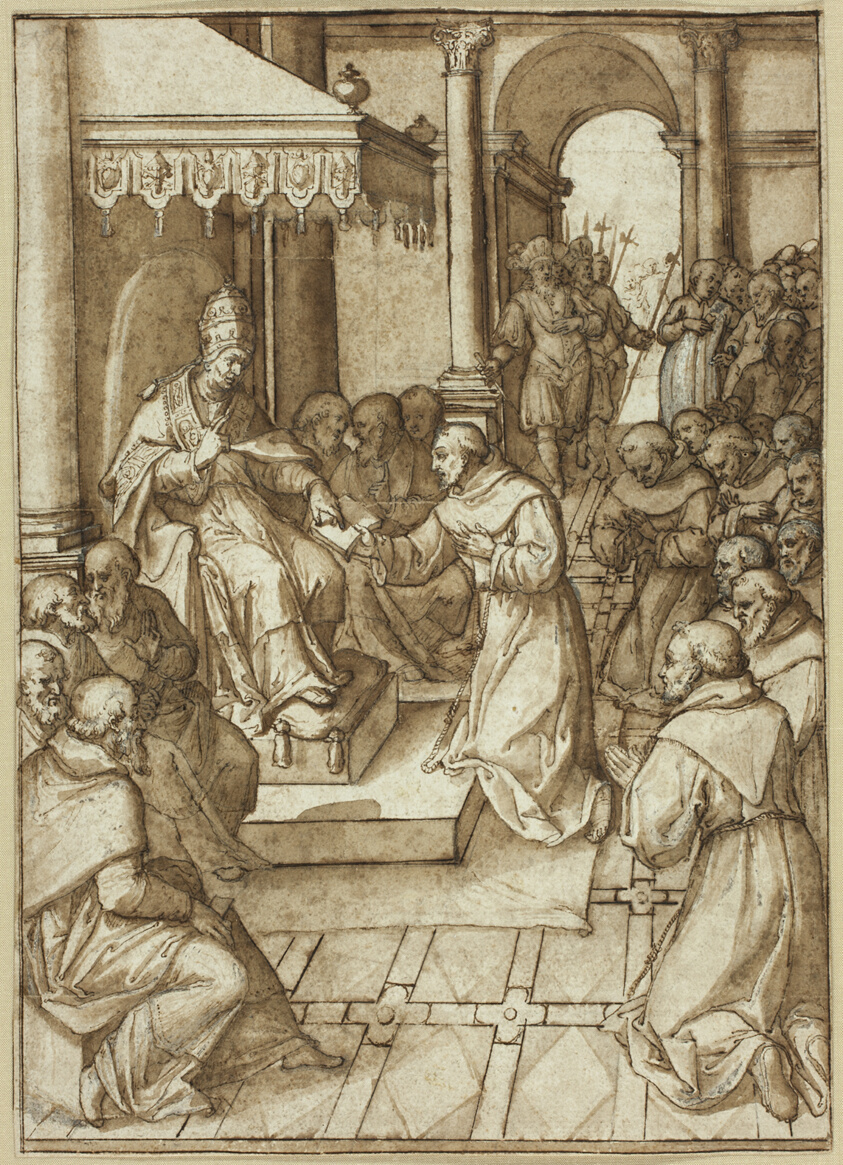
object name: Drawing and Watercolor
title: Approval of the Rules of the Franciscan Order by Pope Innocent III in 1209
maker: Livio Agresti (Italian, 1508–1579)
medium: Pen and brown ink, with brush and brown wash, heightened with lead white gouache, over incising and black chalk, on cream laid paper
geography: Italy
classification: pen and ink drawings; brush and ink; brush and wash; drawings (visual works); paper; prints and drawing; gouache; chalk; chalk with ink